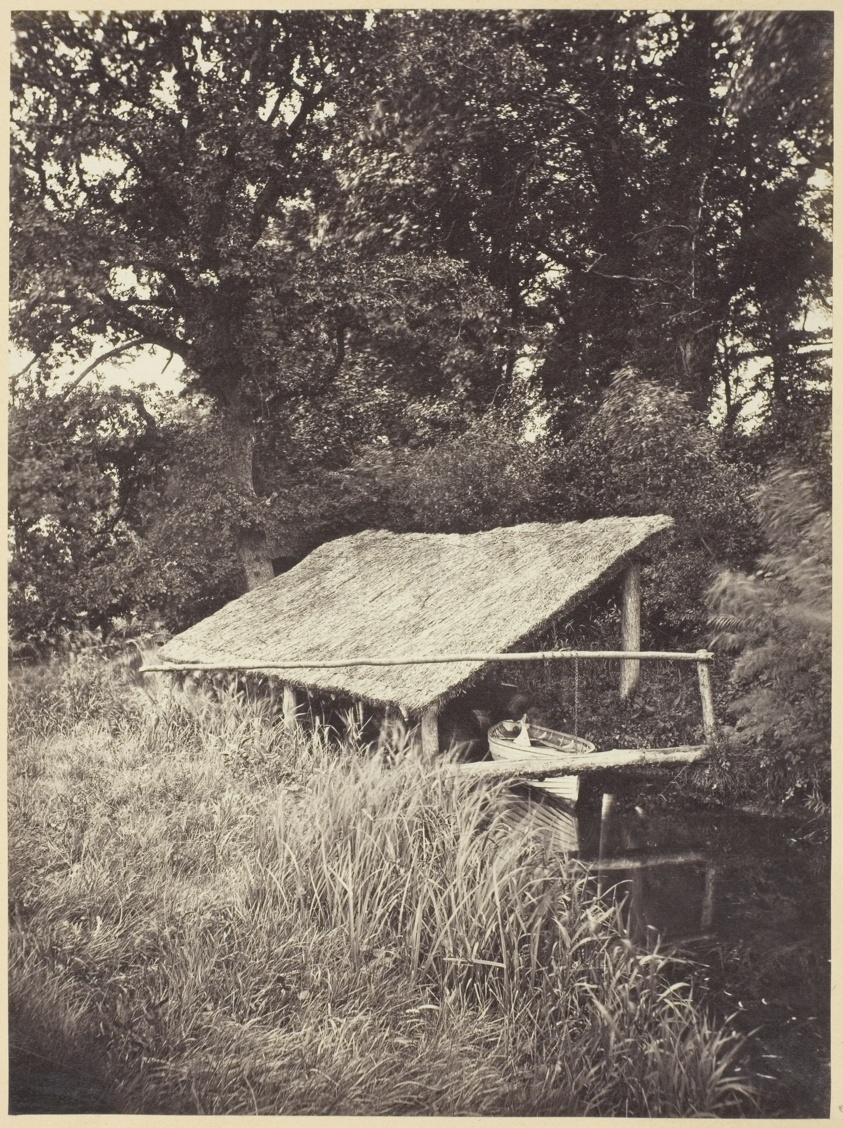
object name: Photograph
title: Boat House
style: 19th century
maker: Miss T. Powell (Unknown, 19th century)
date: 1840/1900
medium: Albumen print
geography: Unknown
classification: albumen silver print; photographic process; photography; photograph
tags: landscapes, photography